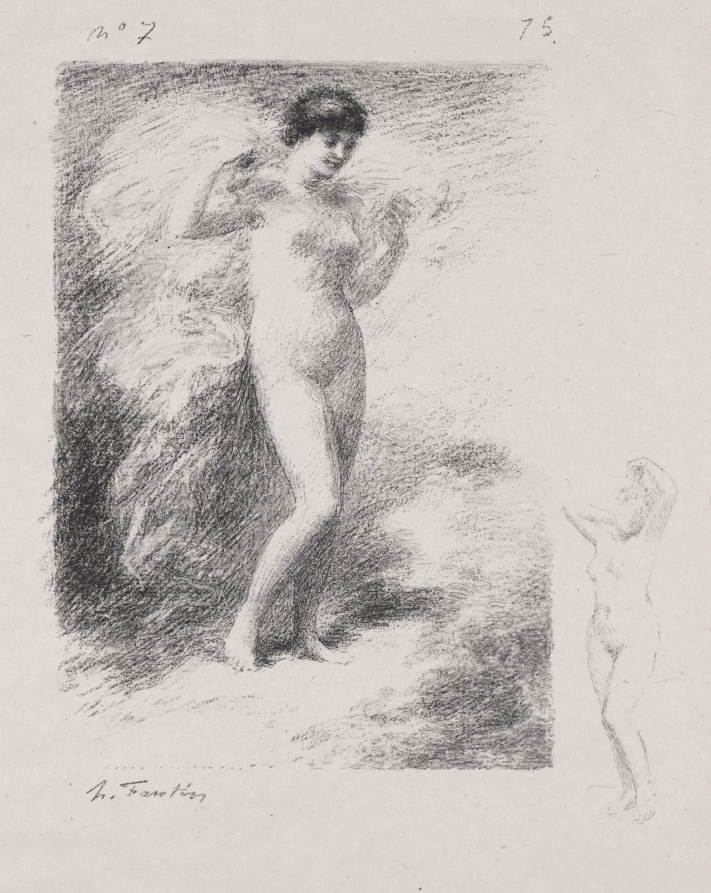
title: Néère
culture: France, 19th century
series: Illustrations for the Poems of André Chénier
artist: Henri Fantin-Latour (French, 1836–1904)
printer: Auguste Clot (French, 1858–1936)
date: c. 1903–05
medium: lithograph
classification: Print